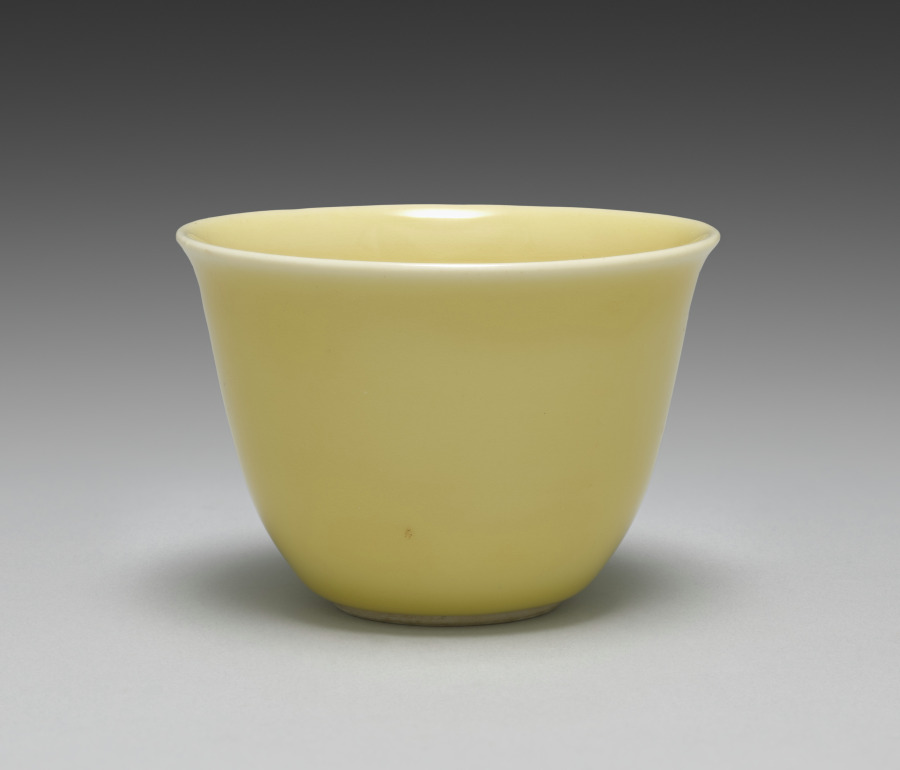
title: Cup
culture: Japan, Taishō period (1912–26) or Shōwa period (1926–89)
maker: Seifū Yohei IV (Japanese, 1872–1951)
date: 1914–46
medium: porcelain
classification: Ceramic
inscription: 清風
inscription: 清風造 【印】成山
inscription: 清風盧人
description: Like his father, Yohei IV also produced works with red or yellow monochrome glazes. His yellow-glazed works include this set of five drinking cups, a pair of sake pourers CMA 2022.216, and a sweets bowl molded into the shape of a chrysanthemum CMA 2022.218.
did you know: Seifū Yohei IV learned the ceramics industry from his father and painting from Tanomura Shosai.